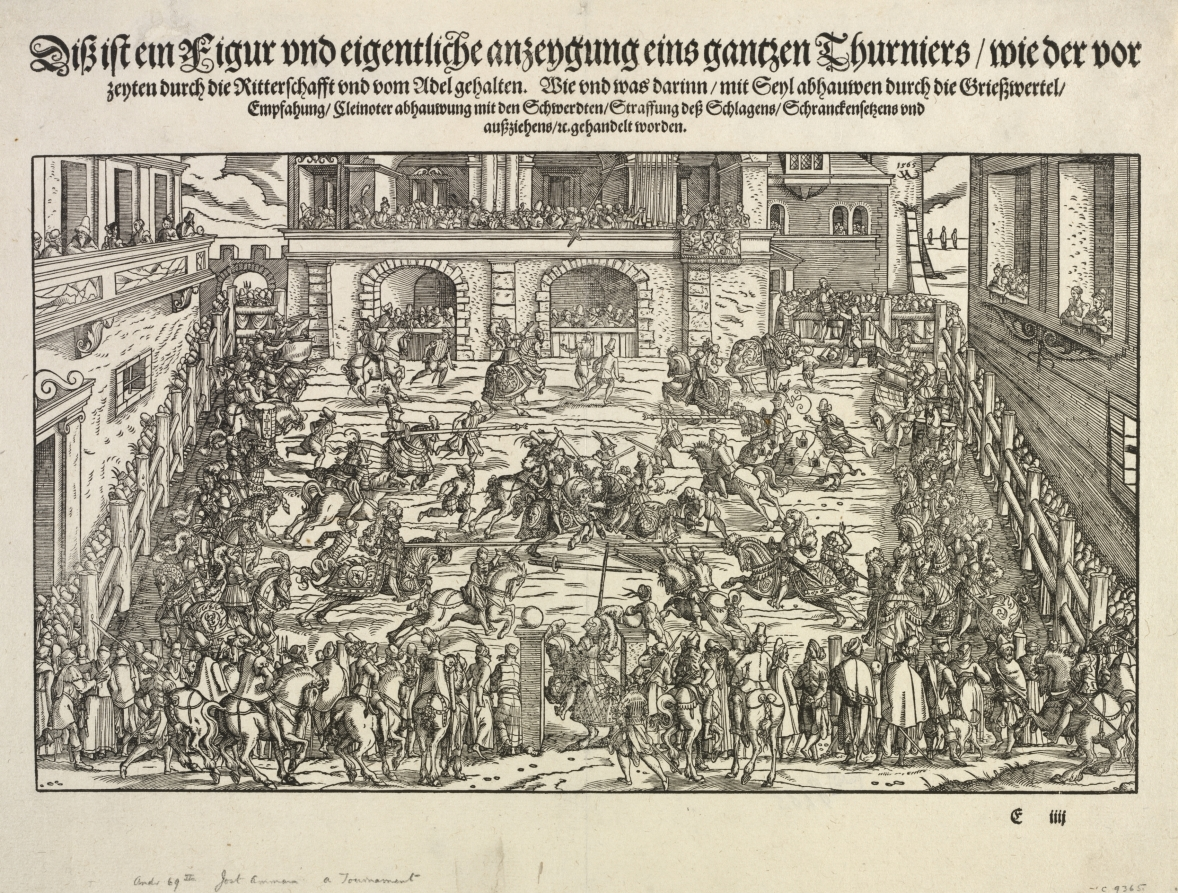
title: A Tournament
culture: Switzerland, worked in Germany, 16th century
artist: Josse Amman (Swiss, 1539–1591)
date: 1565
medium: woodcut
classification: Print